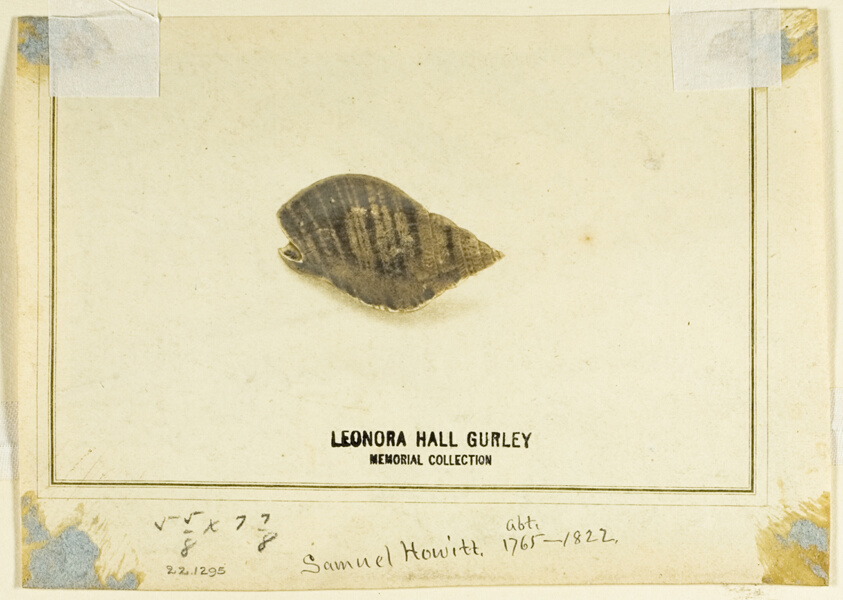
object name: Drawing and Watercolor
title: North American Bear Hunting (recto); Shell (verso)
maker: Recto attributed to Samuel Howett (English, c. 1765-1822); Verso by Unkown Artist (British, 19th c.)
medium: Pen and brown ink, with brush and brown wash, over graphite (recto), and graphite (verso), on ivory wove paper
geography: England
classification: ink or chalk wash; drawings (visual works); prints and drawing